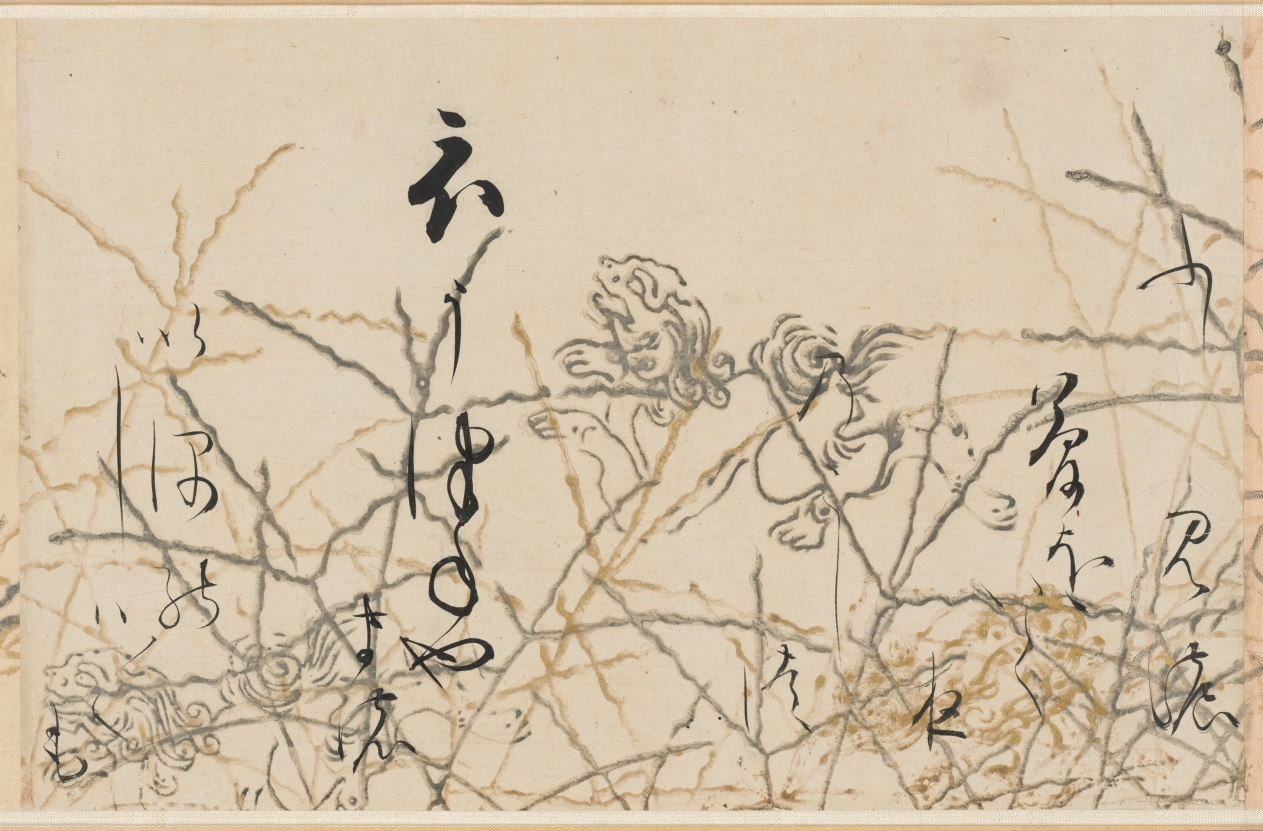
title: Selections from the New Collection of Japanese Poems from Ancient and Modern Times (Shinkokin wakashū) with Printed Designs of Chinese Lions and Crab Finger Grass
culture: Japan, Edo period (1615–1868)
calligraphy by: Hon'ami Kōetsu (Japanese, 1558–1637)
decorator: Tawaraya Sōtatsu (Japanese, c. 1570–c. 1640)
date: early 1600s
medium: handscroll; ink, gold, and silver on paper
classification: Calligraphy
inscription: Seal: 光悦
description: Hon’ami Kōetsu was a calligrapher and craftsman who frequently collaborated with the painter Tawaraya Sōtatsu, considered the first master of the Rinpa school. Kōetsu brushed seven poems from the autumn section of a poetry anthology onto dyed paper with motifs designed and printed in gold and silver by Sōtatsu.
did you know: Before becoming a master painter of screens, Tawaraya Sōtatsu painted fans.